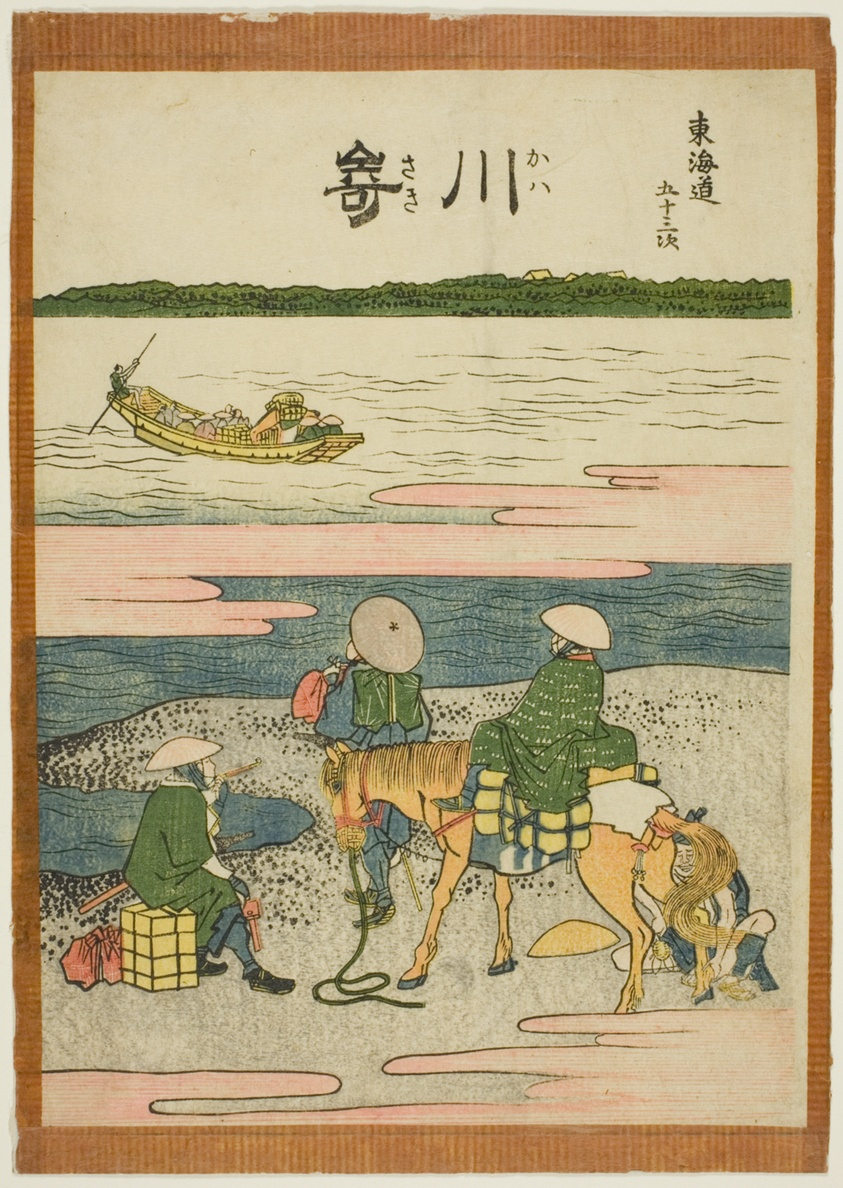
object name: Print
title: Kawasaki, from the series "Fifty-three Stations of the Tokaido (Tokaido gojusan tsugi)"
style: Japanese (culture or style)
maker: Katsushika Hokusai 葛飾 北斎; Japanese, 1760-1849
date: c. 1806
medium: Color woodblock print; chuban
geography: Japan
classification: woodblock print; print; asian art